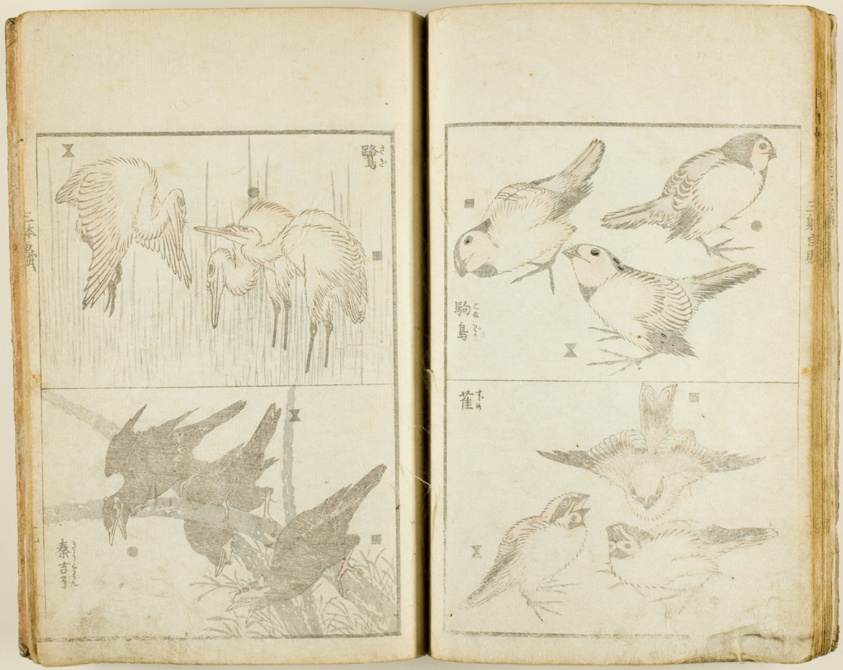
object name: Book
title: Santai gafu (Album of Drawings in Three Ways), complete in 1 vol.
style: Japanese (culture or style)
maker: Katsushika Hokusai 葛飾 北斎; Japanese, 1760-1849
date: c. 1816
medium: Book; woodblock printed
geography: Japan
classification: book; woodblock print